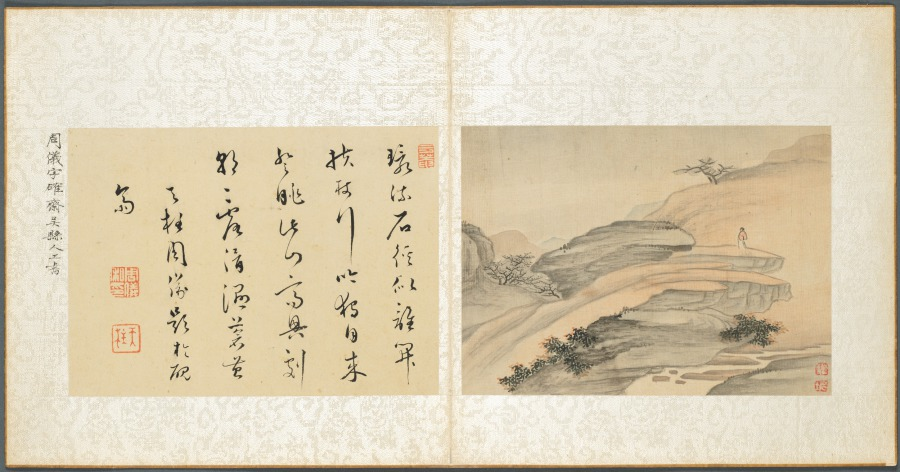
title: Album of Miscellaneous Subjects, Leaf 5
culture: China, Qing dynasty (1644-1911)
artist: Fan Qi (Chinese, 1616–after 1694)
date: early 1650s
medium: album leaf, ink and color on silk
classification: Painting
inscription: Artist seal: Fan Qi 樊圻. Poem by Zhou Yi 周儀 (mid 17th century–about 1705): That stone path surrounded by streams - for whom was it created?/ Leaning on my staff, I walk and hum, arriving alone./ As soon as I ascend to gaze at these mountains, my happiness increases,/ Every morning the moistening dew makes slippery the green moss.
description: Fan Qi's painting on the fifth leaf evokes Zuo Si's poetic line: I shake my robe atop the cliff of thousand ren. The calligraphy by Zhou Yi adjacent to the painting reads: That stone path surrounded by streams—for whom was it created? Leaning on my staff, I walk and hum, arriving alone. As soon as I ascend to gaze at these mountains, my happiness increases, Every morning the moistening dew makes the green moss slippery.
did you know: Barren tree branches on the peak and the bushes' reddish foliage give the scene an autumnal feel.